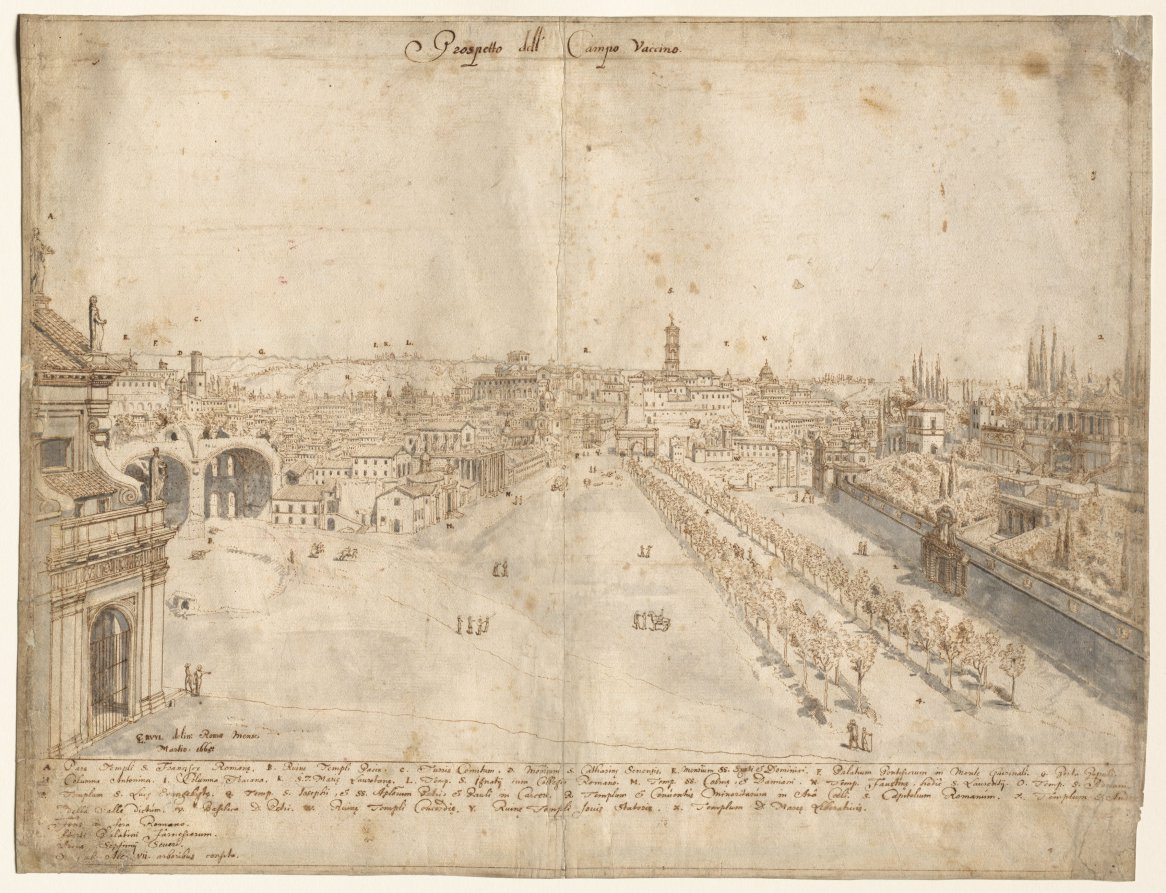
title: Eighteen Views of Rome: The Campo Vaccino (The Roman Forum)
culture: Flanders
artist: Lievin Cruyl (Flemish, c. 1640-c. 1720)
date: 1665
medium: pen and brown ink and brush and gray wash over stylus and graphite; framing lines in brown ink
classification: Drawing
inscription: signed, lower right, in brown ink: [artist's monogram: LC] RVYL delin: Romæ mense / Martio. 1665. ; by artist, upper center, in brown ink: Prospetto dell' Campo Vaccino. ; by artist, throughout composition, in brown ink: [the letters A-Y and the numerals 1-4] ; by artist, across bottom, in brown ink: A. Pars Templi S. Francescæ Romanæ. B. Ruinæ Templi Pacis. C. Turris Comitum. D. Montorium S. Catharinæ Senensis. E. Monrium SS. Syxti et Dominici. F. Palatium Pontificium in Monte Quirinale. G. Porta Populi. / H. Columna Antonina. I. Columna Traiana. K. S.T. Mariæ Laurentanæ. L. Temp. S. Ignatij cum Collegio Romano. M. Temp. SS. Cosmæ, et Damiani. N. Temp. Fautinæ, hodiè S. Laurentij. O. Temp. Adreani. / P. Templum S. Lucæ Evangelistæ. Q. Temp. S. Iosephi, et SS. Aplorum Petri, et Pauli in Carcere. R.Templum et Conventus Minoritarum in Arâ Coeli. S. Capitolium Romanum. T. Templum S. Andr[ea] / della Valle dictum. U. Basilica S. Petri. W. Ruinæ Templi Concordiæ. V. Ruinæ Templi Jovis Statoris. X. Templum D. Mariæ Liberatoris. / [1]. Fons in Foro Romano. / 2. Horti in Palatini Farnesiorum. / 3. Arcus Septimij Severi. / [4.] V[ia] ab Alex. vii. arboribus consita. ; ON STRIPS OF PAPER MOUNTED TO VERSO, lower center, in graphite: A20967 ; lower right, in graphite: E. 17 ; ON PIECE OF PAPER APPLIED TO VERSO AS A REPAIR, center, in graphite: [two lines of illegible inscription] [masked]